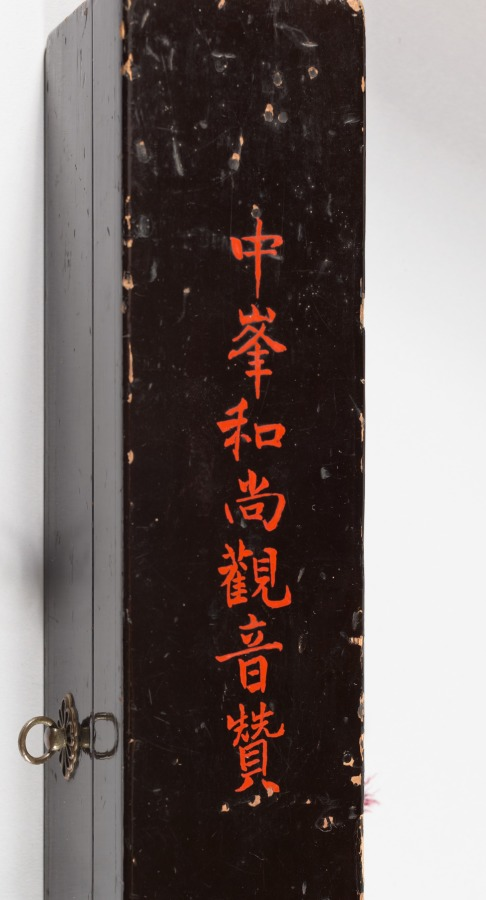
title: White-Robed Guanyin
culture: China, Yuan dynasty (1271-1368)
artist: Jueji Yongzhong (Chinese, active around 1300)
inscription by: Zhongfeng Mingben (Chinese, 1263–1323)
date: late 1200s–early 1300s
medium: hanging scroll; ink on paper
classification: Painting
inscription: Artist's signature: Huanzhu Yongzhong. Inscription by Zhongfeng Mingben: The right thinking [Samkalpa] is embodied within His deep meditation on the Buddha [naga-samadhi]. Retaining not even one single object of thought, A perfect harmony was wonderfully achieved. In the endless time and space, His all-embracing compassion prevails. [signed] Mingben of Huanzhu paying his respects.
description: Guanyin, the bodhisattva of infinite compassion (Avalokiteshvara, in Sanskrit), reveals himself in many forms. According to Buddhist belief, one such manifestation is the white-robed Guanyin sitting on a rock on the island of Putuo (Potalaka, in Sanskrit), located along the coast not far from Ningbo, in Zhejiang Province, China. Here, the figure was swiftly drawn in only a few ink lines. The inscription above is by Zhongfeng Mingben, perhaps the most widely respected and influential Chan (Zen in Japanese) master in the Yuan dynasty. The artist’s signature is a single line below on the left: Huanzhu Yongzhong.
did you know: The CMA collection includes a drawing by a Japanese priest, CMA 1978.47.2, inspired by this composition.